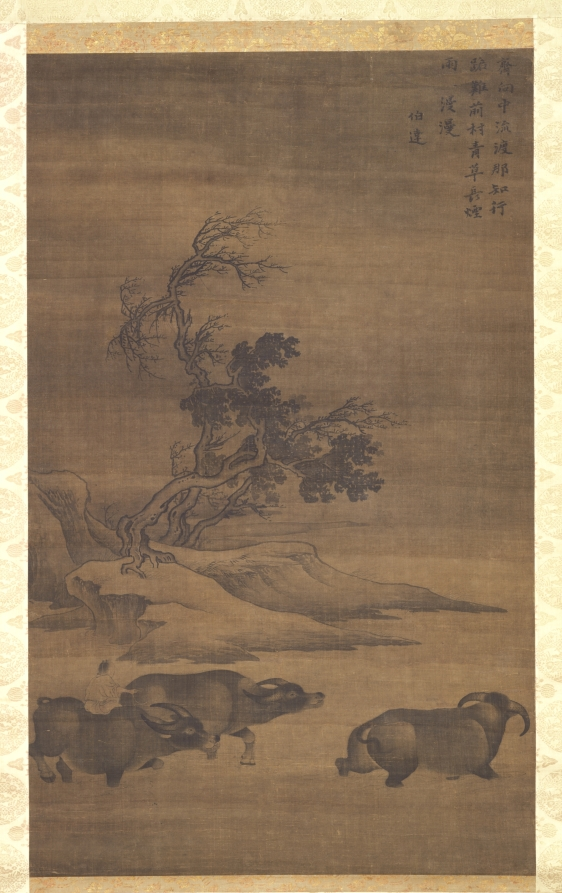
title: Herdboys and Buffalo in Landscape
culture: China, Qixian, Yuan dynasty (1271-1368)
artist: Guo Min (Chinese, mid-late 1200s)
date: 1200s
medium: Hanging scroll; ink on silk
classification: Painting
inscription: 齊向中流渡，那知行路難。/ 前村青草長，煙雨□漫漫。/ 伯達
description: Herdboys tend their buffalo in a bucolic landscape by a winding stream. Guo Min emphasizes the massive forms and mighty power of the animals, transforming them into forces of nature. The poem on this scroll reads: "Together, they wade through the middle of the stream, Mindless of perils in the journey. The grass grows tall in the village ahead, While the mist and rain spread far and wide."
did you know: Tending water buffalos has traditionally been the task of young boys and can still be seen in rural areas of Southern China today.